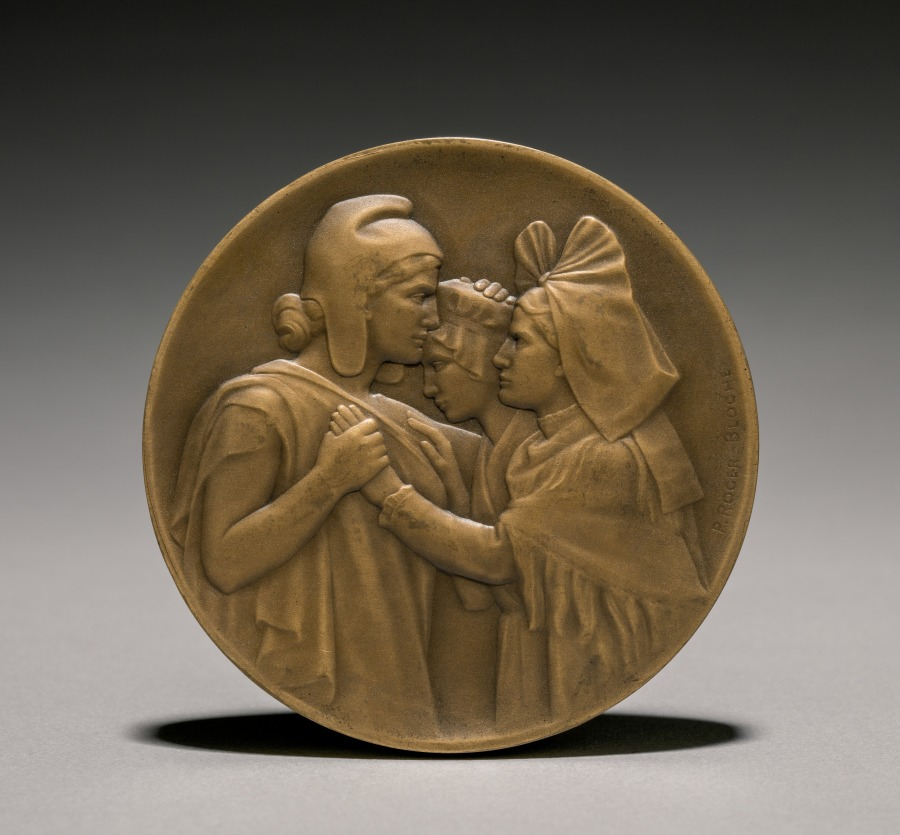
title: Medal (obverse)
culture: France, 20th century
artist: Paul Roger-Bloche (French)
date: 1900s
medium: bronze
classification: Metalwork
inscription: "Retour del 'Alsace et de la Lorraine à la France. 11 Novembre 1918."